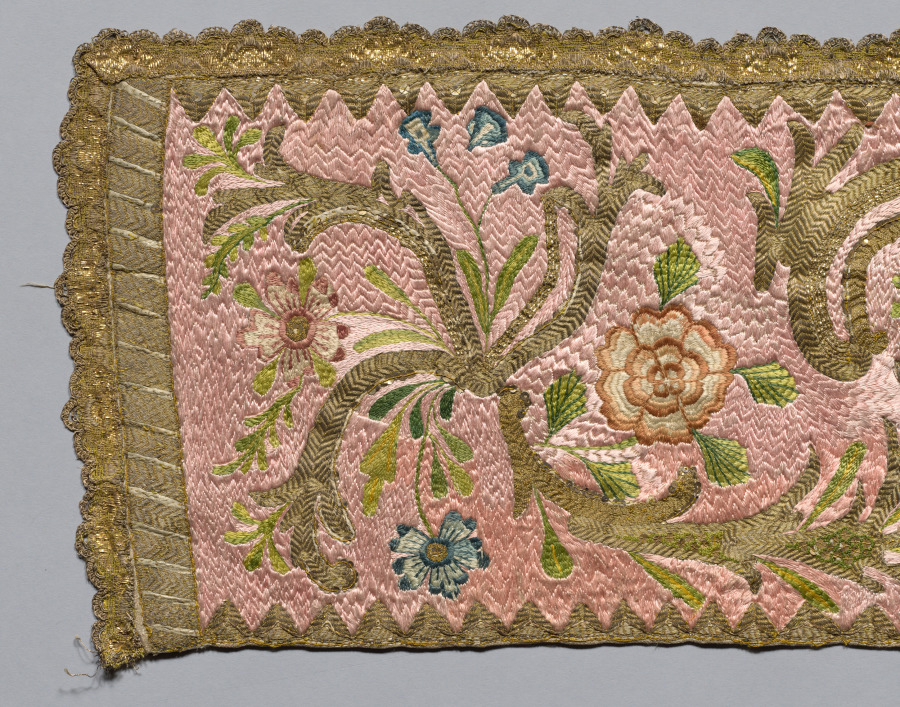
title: Embroidered Strip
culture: Italy, 18th century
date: 1700s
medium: embroidery, silk and gold thread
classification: Embroidery